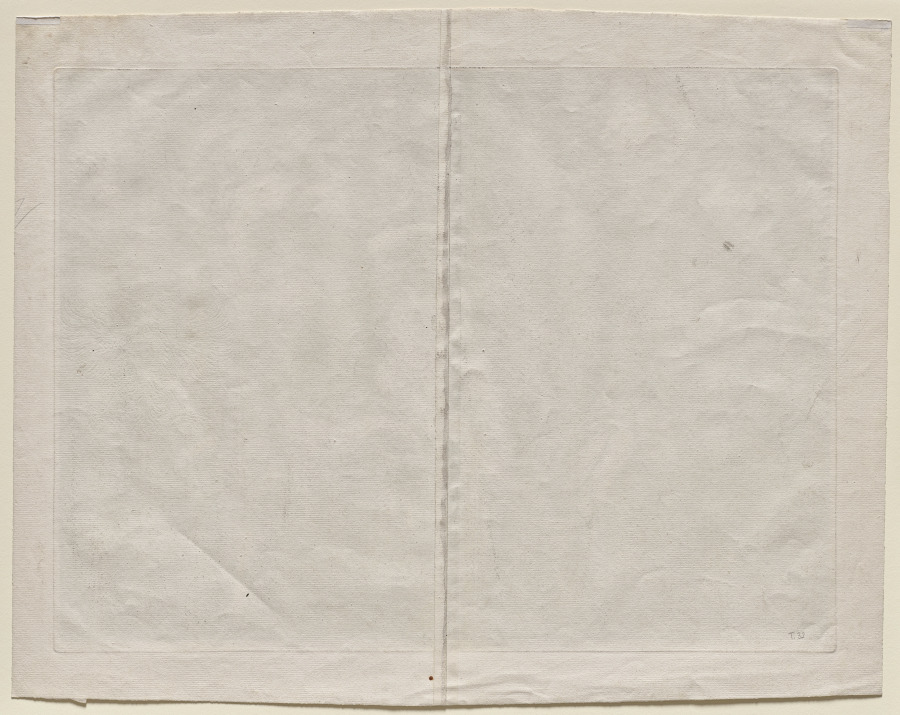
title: Mercury Orders Calypso to Allow Ulysses Depart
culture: Netherlands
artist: Gerard de Lairesse (Flemish, 1641–1711)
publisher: Nicolaes Visscher (Netherlandish, 1649–1702)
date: c. 1670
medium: etching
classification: Print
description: In Homer’s Odyssey, Odysseus spends seven years captive to the nymph Calypso. Despite Calypso’s charms, Odysseus longed to return home to his family. In this composition, De Lairesse depicts the moment when the Olympian gods intervene, sending Hermes to release Odysseus from Calypso’s captivity. The Dutch De Lairesse brought French artistic taste to the Netherlands, reflected here in the firmly modeled, idealized figures and classical architecture.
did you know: A painting by this artist of the same subject is also in the museum’s collection (see 1992.2).